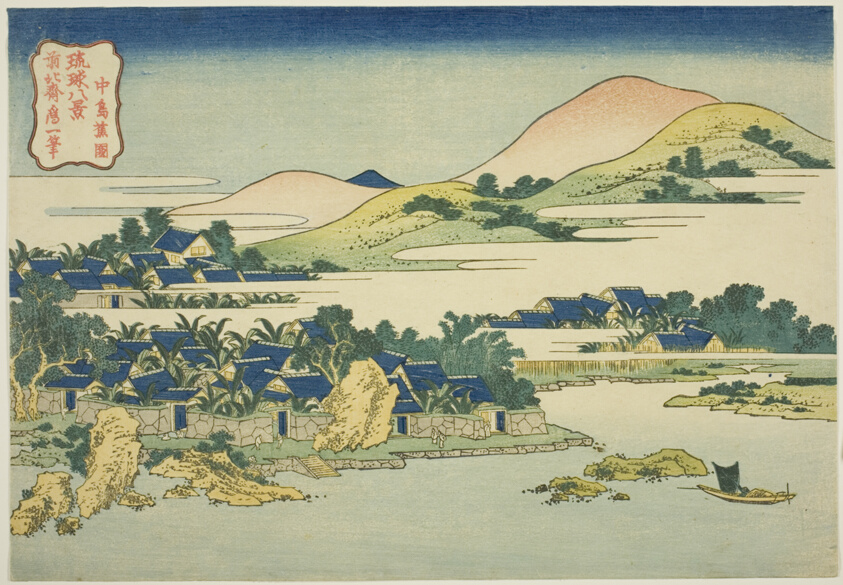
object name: Print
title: Banana Garden at Nakashima (Nakashima shoen), from the series "Eight Views of the Ryukyu Islands (Ryukyu hakkei)"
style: Japanese (culture or style)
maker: Katsushika Hokusai 葛飾 北斎; Japanese, 1760-1849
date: c. 1832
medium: Color woodblock print; oban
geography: Japan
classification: woodblock print; print; asian art